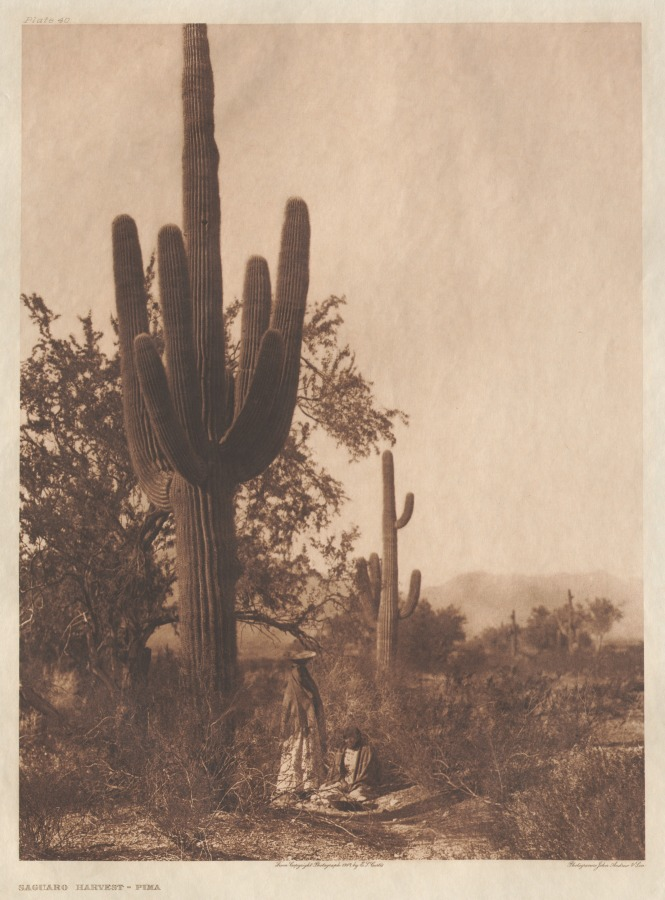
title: Portfolio II, Plates 40-75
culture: America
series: The North American Indian: being a series of volumes picturing and describing the Indians of the United States, The Dominion of Canada, and Alaska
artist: Edward S. Curtis (American, 1868–1952)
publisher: The University Press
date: 1903–7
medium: photogravure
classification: Portfolio